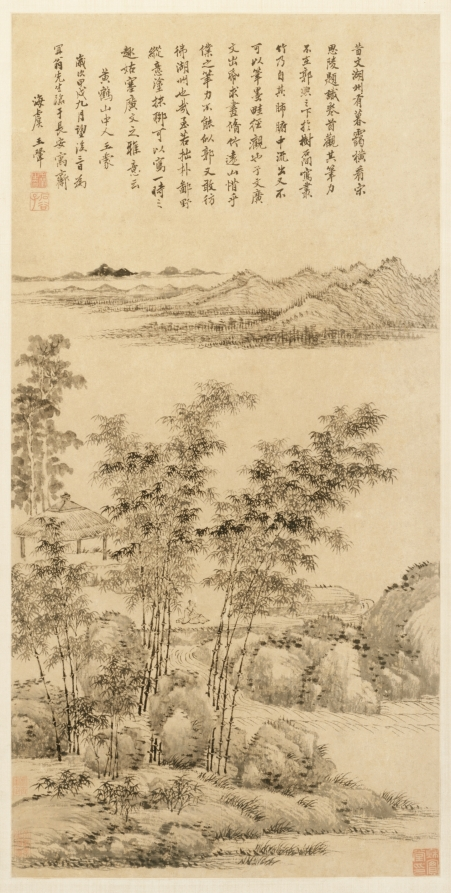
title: Tall Bamboo and Distant Mountains, after Wang Meng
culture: China, Qing dynasty (1644-1911)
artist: Wang Hui (Chinese, 1632–1717)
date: 1694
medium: Hanging scroll; ink on paper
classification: Painting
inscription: 昔文湖州有暮靄橫看。宋思陵題識卷首：觀其筆力不在郭煕之下。於樹石間寫叢竹，乃自其肺腑中流出，又不可以筆墨畦徑觀也。 子文廣文出紙求畫修竹遠山。惜乎僕之筆力，不能似郭。又敢彷彿湖州也哉？至若拙朴鄙野，縱意塗抹，聊可以寫一時之趣。姑塞廣文之雅意云。黃鶴山中人王蒙書。 歲次甲戌九月望後三日為冝翁先生臨于長安寓齋。海虞, 王翬。[印]王翬之印; 石谷子.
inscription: 3 additional seals: 1 of Pang Yuanji 龐元濟 (1864–1949); 2 unidentified.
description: Wang Hui studied paintings by earlier masters and digested their styles with unceasing virtuosity. He had such enduring affection for a landscape by Wang Meng 王蒙 (about 1308–85) that between 1686 and 1712, he made several copies, like this example. One of his compositional transformations here was moving the scholar from the pavilion directly into the landscape by the stream. His faithful copying also included inscriptions. Wang Meng had written that he was trying to resuscitate the style of an earlier artist, Wen Tong (1018–1079); therefore, Wang Hui sought to revive both Wang Meng and Wen Tong.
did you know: As a leading figure in the Orthodox School of Chinese painting, Wang Hui believed that the act of painting was a dialogue with one or more masters of the past.